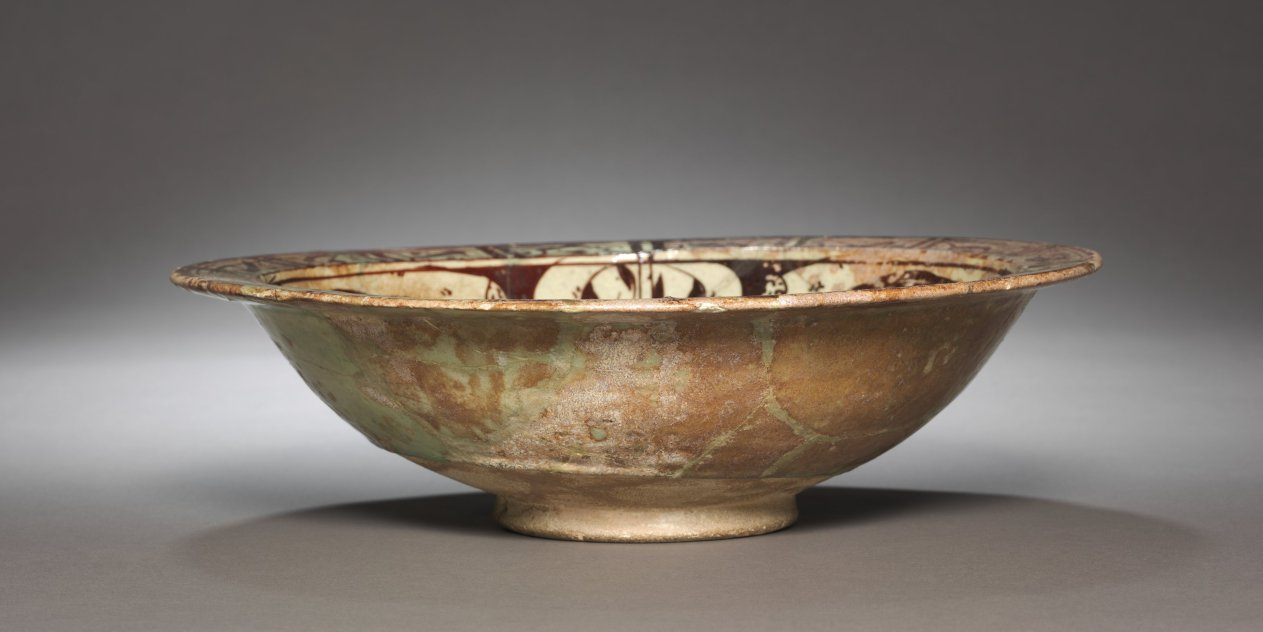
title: Bowl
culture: Ayyubid Syria, Rusapha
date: late 1100s–early 1200s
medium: fritware with luster-painted design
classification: Ceramic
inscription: Rim decoration may represent highly abstracted scripts but there are no legible words.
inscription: Label on bowl reads: "Parish-Watson & Co., Inc./ Old Chinese Porcelains / 44 E. 57th St., NY, NY"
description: This deep bowl with a wide flat rim is coated with a pale sea-green glaze. The interior is divided into three triangular sections by a simple foliate pattern. Within each triangle, a seated figure holding a cup is reserved in splashes of chocolate-colored luster. The rim is decorated with 15 panels containing freely painted dots and strokes, which suggest highly abstracted script.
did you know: Fritware approximates the appearance of porcelain. Potters made a paste of ground quartz, clay, and glass, which when fired, created a compact white material closely resembling precious porcelain.